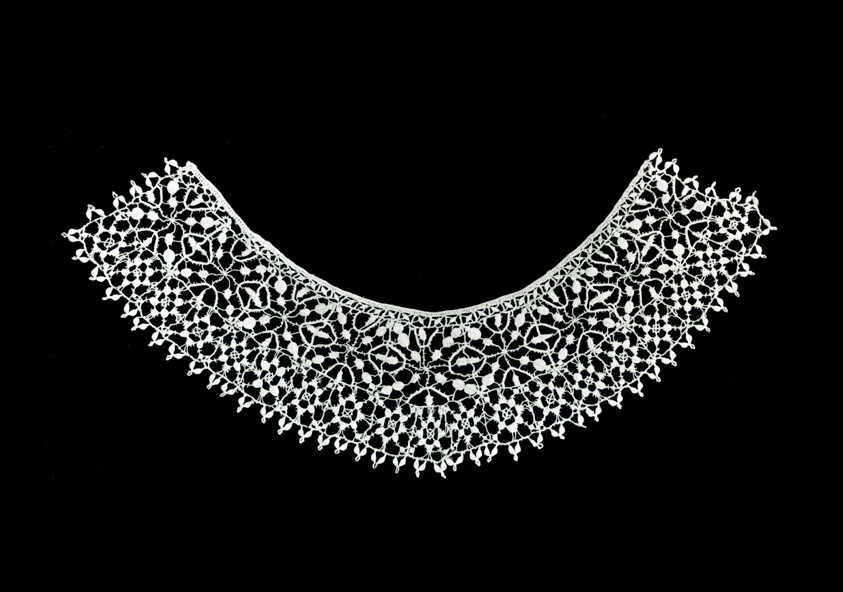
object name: Textile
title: Collar (Made from Border)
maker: Italy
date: 1601/25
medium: Linen, three bands of needle lace; upper band worked on a plain weave cut and drawn thread work grid; embroidered in double hem stitches; later edging of bobbin straight lace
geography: Italy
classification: textile; lace - needle